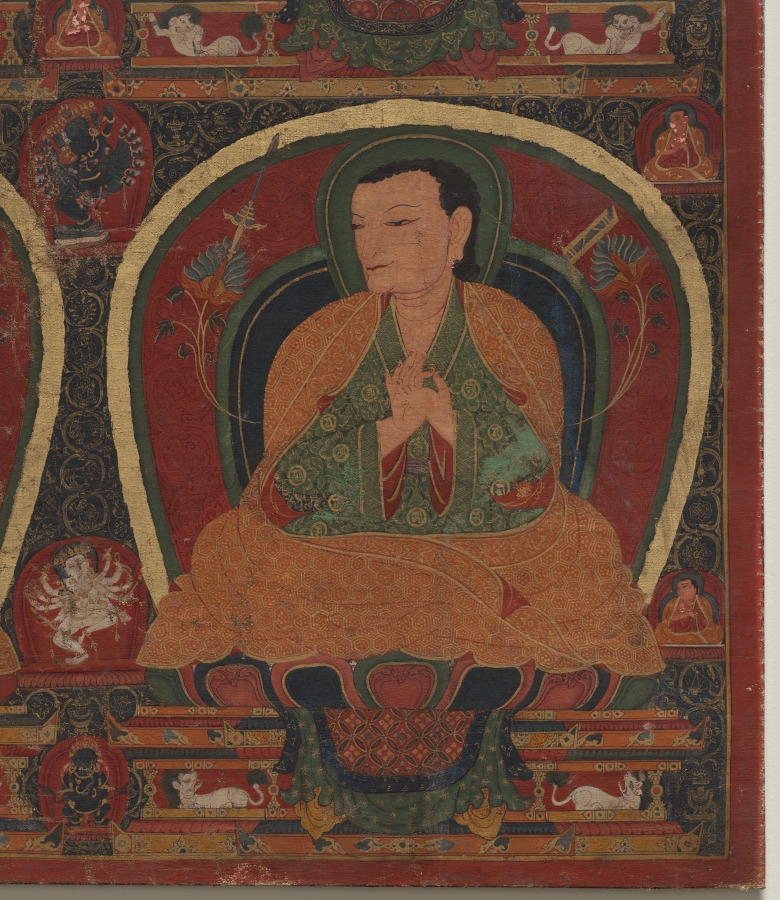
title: Four seated Masters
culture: Central Tibet, Ngor monastery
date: c. 1450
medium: Gum tempera and gold on cotton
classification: Painting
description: Founders and prominent masters of the Sakya order of Buddhism in Tibet are featured in this painting as part of the lineage of teachers who transmitted knowledge of their fundamental text, the Hevajra Tantra. It is part of a series of paintings made at one of the main Sakya monastic centers, which had close ties with Nepal. This Tibetan artwork includes Nepalese features, such as the delicate, decorative quality of the painting, its two-dimensionality, the exaggerated curvature of the upper eyelid, and the filling of all spaces with scrollwork.